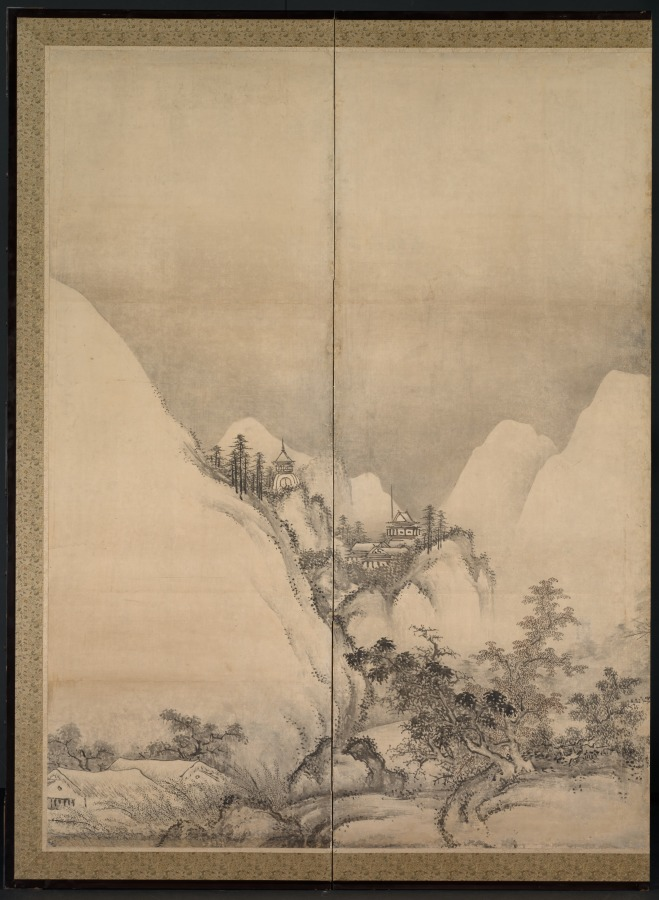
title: Chinese Landscape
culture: Japan, Muromachi period (1392–1573)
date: 1500s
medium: One of a pair of six-fold screens; ink and slight color on paper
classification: Painting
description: In a panorama of mountains and expanses of water, three gentlemen have assembled by moonlight to enjoy one another’s company away from a bustling village. An influx of ink paintings from China in both album and scroll formats beginning in the late 1200s inspired Japanese artists to create landscapes based upon Chinese prototypes. Later, Japanese painters adapted the imagery to the larger format of folding screens, which were used to define spaces in large rooms.